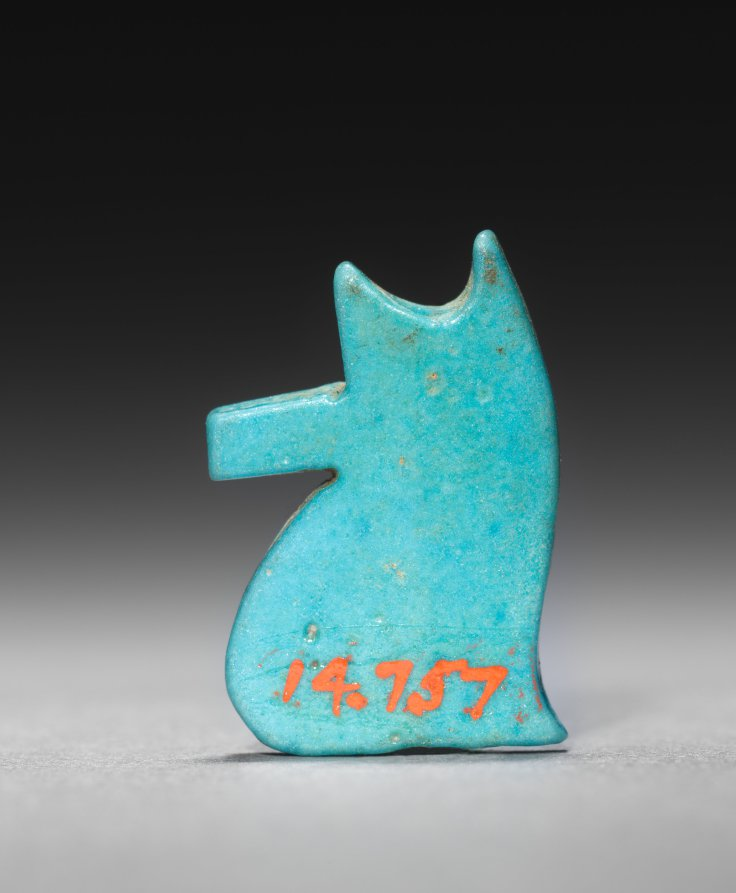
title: Eye of Horus Amulet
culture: Egypt, Third Intermediate (1069–715 BCE), Dynasties 22–25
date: 945–715 BCE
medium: turquoise faience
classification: Amulets